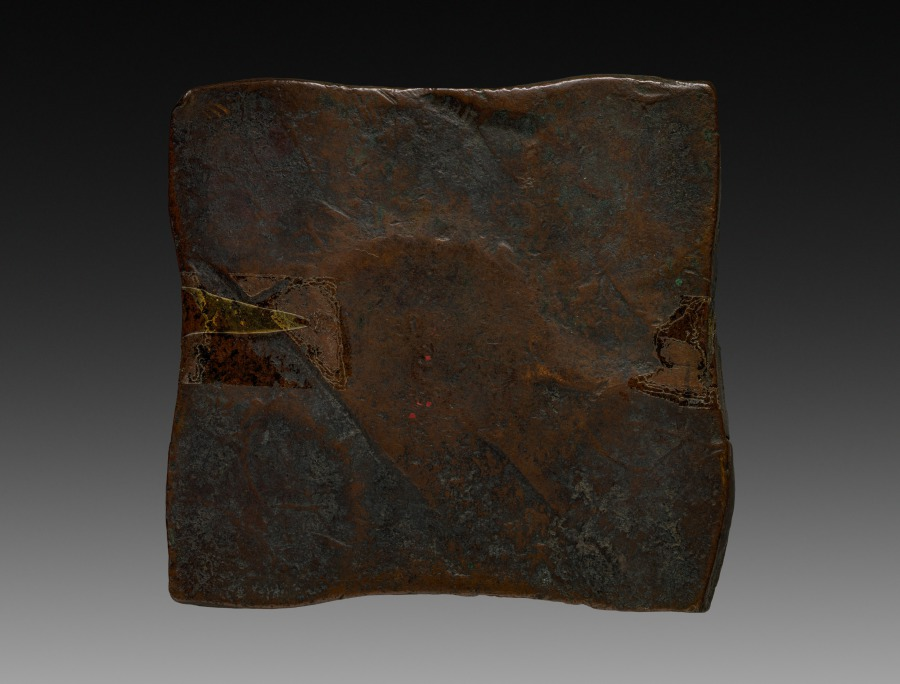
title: Swedish Plate Money (Half Daler)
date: 1731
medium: copper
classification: Metalwork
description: Some monetary denominations in Sweden were issued in large plates of copper and silver because the ores were plentiful. However, by the late 1770s these plates were considered too cumbersome, and consequently, Sweden began issuing some of Europe's first denominations in paper money.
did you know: This plate was worth a half daler, which was the standard unit of currency in Sweden in the 18th century.